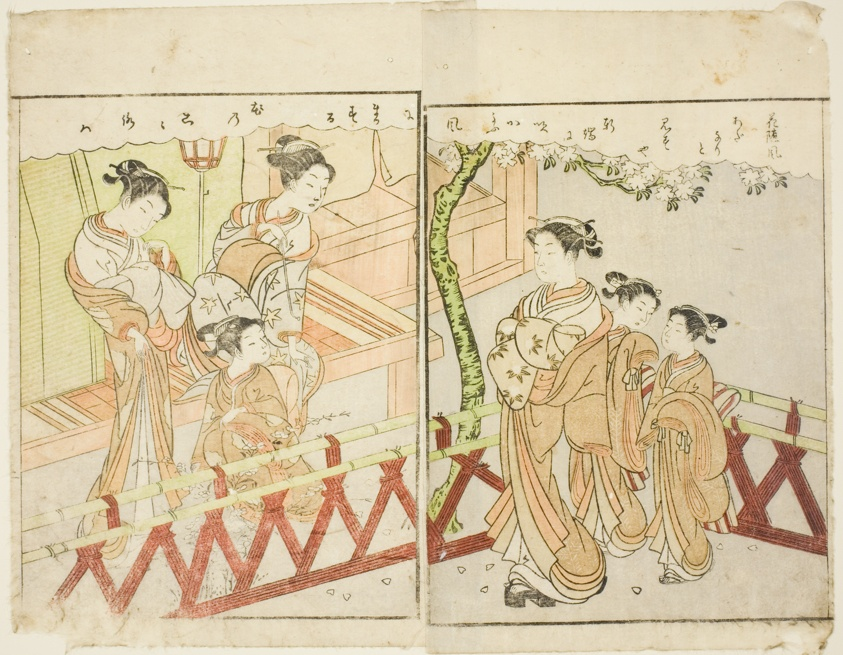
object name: Print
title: Double-page Illustration from Vol. 2 of "Picture Book of Spring Brocades (Ehon haru no nishiki)"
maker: Suzuki Harunobu 鈴木 春信; Japanese, 1725 (?)-1770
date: 1771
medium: Color woodblock print; double-page illustration from book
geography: Japan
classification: woodblock print; print; asian art